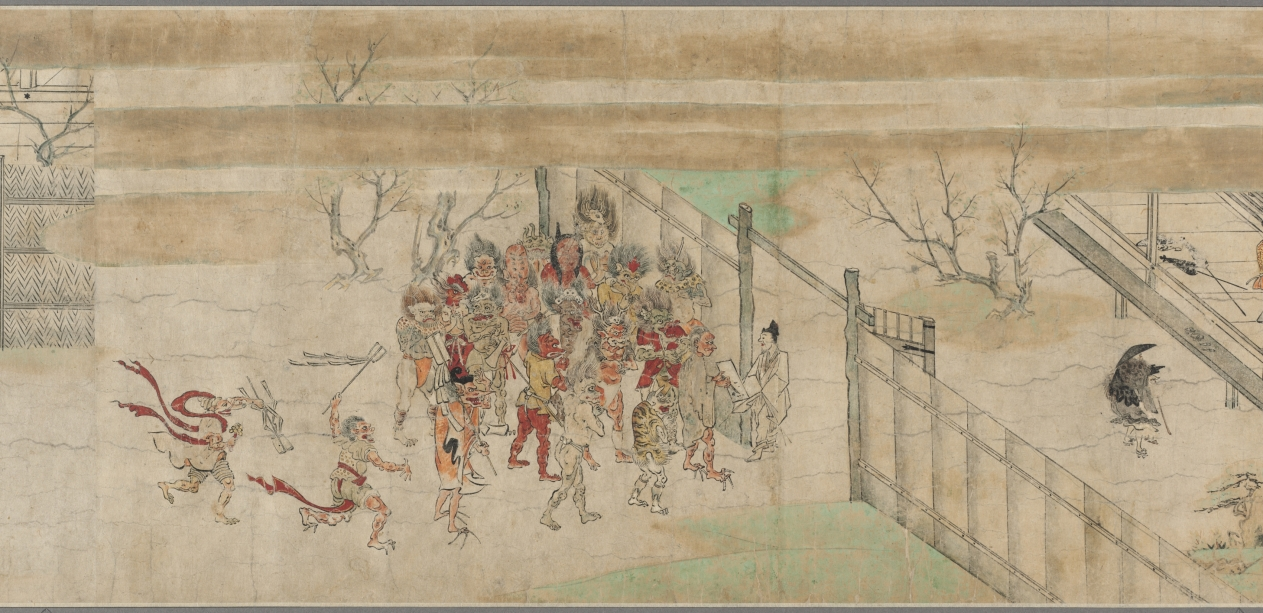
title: The Illustrated Miraculous Origins of the Yūzū Nenbutsu School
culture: Japan, Kamakura period (1185–1333)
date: early 1300s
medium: Handscroll; ink, color, and gold on paper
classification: Painting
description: This painting is the second of a set of two illustrated handscrolls. The first scroll depicts the biography of the Japanese Buddhist monk Ryōnin. This scroll begins with scenes of Ryōnin’s death and relates episodes illustrating the efficacy of following his teachings. Ryōnin asserted the total interconnectedness of all things and the spiritual benefit of chanting the name of the Buddha Amida for one another.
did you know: The other scroll from this two-scroll set belongs to the Art Institute of Chicago.